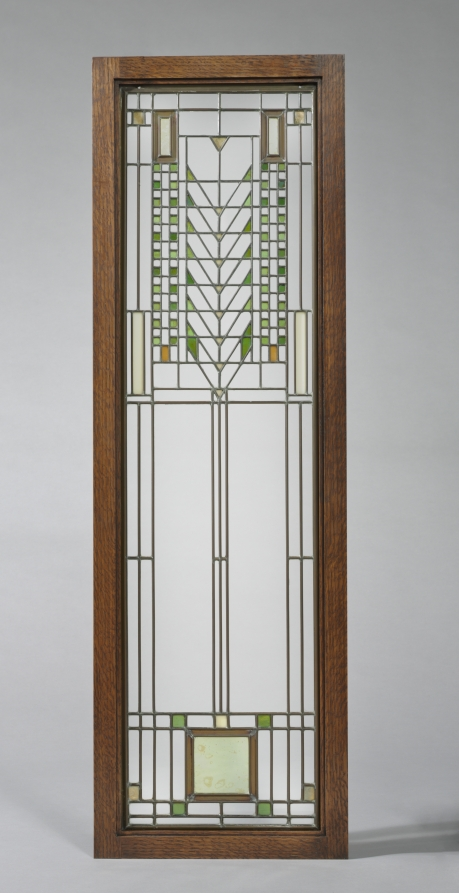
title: Casement Window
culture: America, Illinois, Chicago, 20th century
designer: Frank Lloyd Wright (American, 1867–1959)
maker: Linden Glass Co. (American)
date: c. 1904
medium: leaded glass panes in metal frame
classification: Glass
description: This window was made for the Darwin D. Martin House built in Buffalo, New York, in 1905.